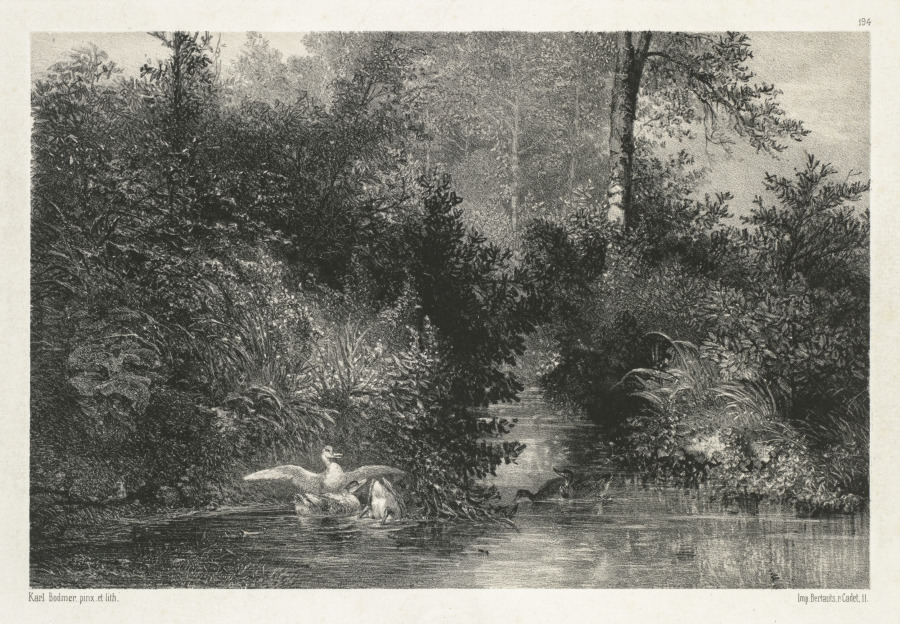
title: Canards (Ducks)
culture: Switzerland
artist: Karl Bodmer (Swiss, 1809–1893)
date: c. 1860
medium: lithograph on chine collé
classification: Print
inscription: above image, upper right corner: 194, lower left corner: Karl Bodmer,pinx.et lith.; lower right: Imp. Bertauts.r.Cadet.11.; mid margin, lower left: Canards